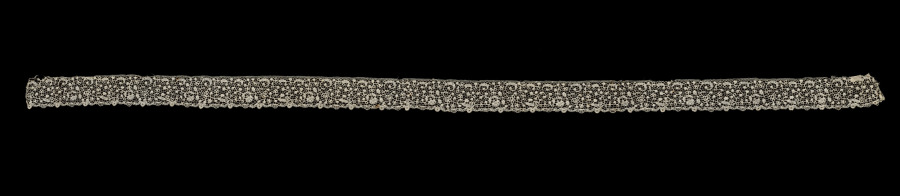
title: Lace Edging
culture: Belgium (Flanders)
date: 1680–99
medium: Bobbin lace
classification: Lace